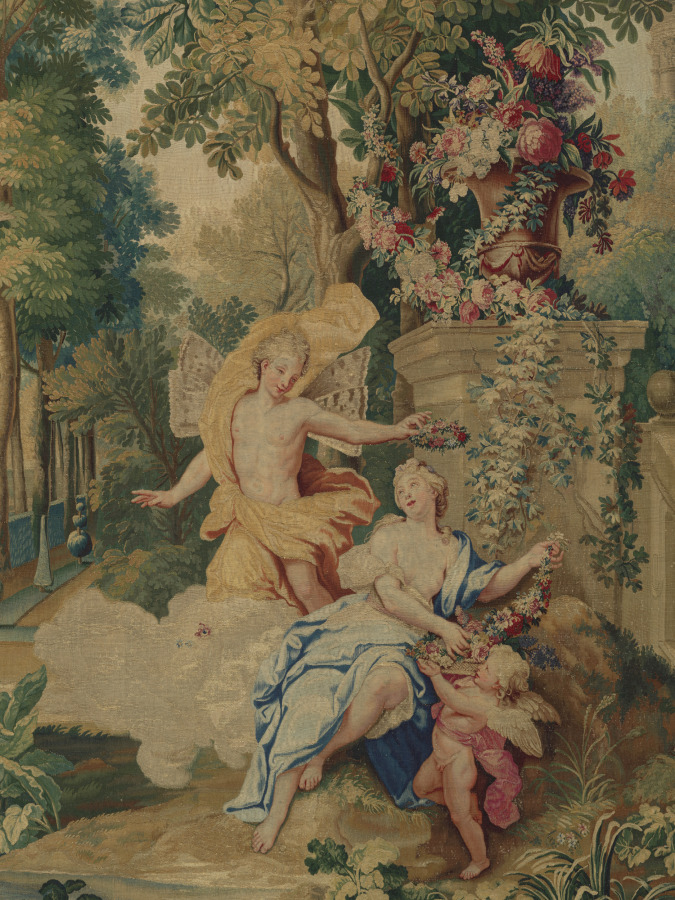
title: Flora and Zephyrus (from Set of Ovid's Metamorphoses)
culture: France, 18th century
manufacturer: Gobelins Manufactory (France, Paris, est. 1662)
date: 1704–1731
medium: tapestry weave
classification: Tapestry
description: In an abundant garden of trees and flowers, the goddess Flora sits beneath a vase of luscious flowers as her husband, the west wind Zephyrus, carried by a white cloud, reaches out to crown her with a floral chaplet. In this tapestry, Zephyrus’s wings resemble those of a butterfly or moth rather than a bird. The ravishing landscape echoes Flora and Zephyrus as springtime divinities. The parrot in the foreground is a colorful intermediary between the viewer and the gods represented in this tapestry.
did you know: During the French Revolution, Gobelins tapestries were sometimes disassembled to harvest the gold threads.